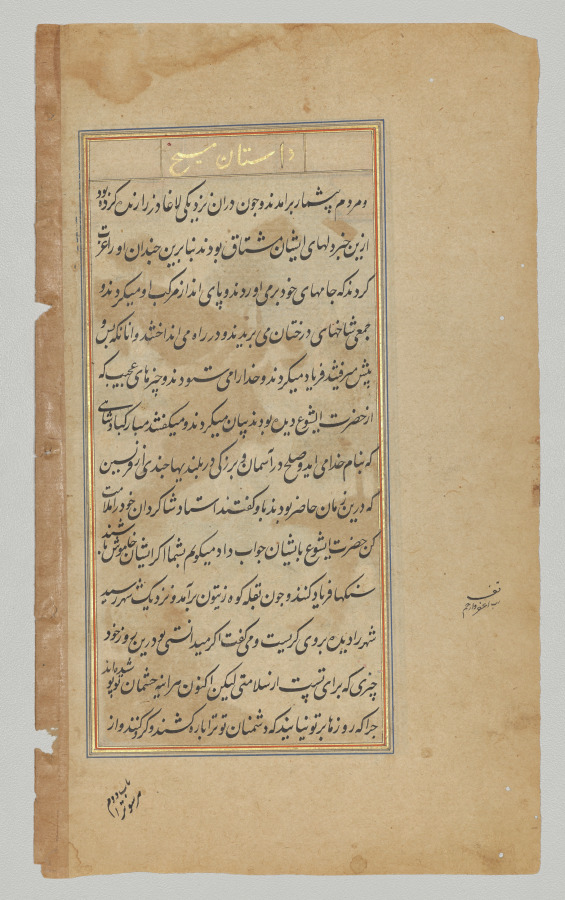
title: The Entry into Jerusalem (folio 156 recto), from a Mirror of Holiness (Mir’at al-quds) of Father Jerome Xavier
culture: Mughal India, Allahabad, made for Prince Salim (1569–1627)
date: 1602–4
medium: Gum tempera, ink, color, and gold on paper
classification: Manuscript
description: Jesus rides astride a female donkey, as specified in the text, and he greets a group of four men, two of whom seem to welcome him with hands extended. He follows the road to the gates of Jerusalem, which appear in the upper left corner. Father Jerome devoted only three short lines to this episode, so perhaps its selection for illustration is connected to an old and popular Islamic saying: “If Jesus’s donkey is taken to Mecca, when it comes back it will still be a donkey.”